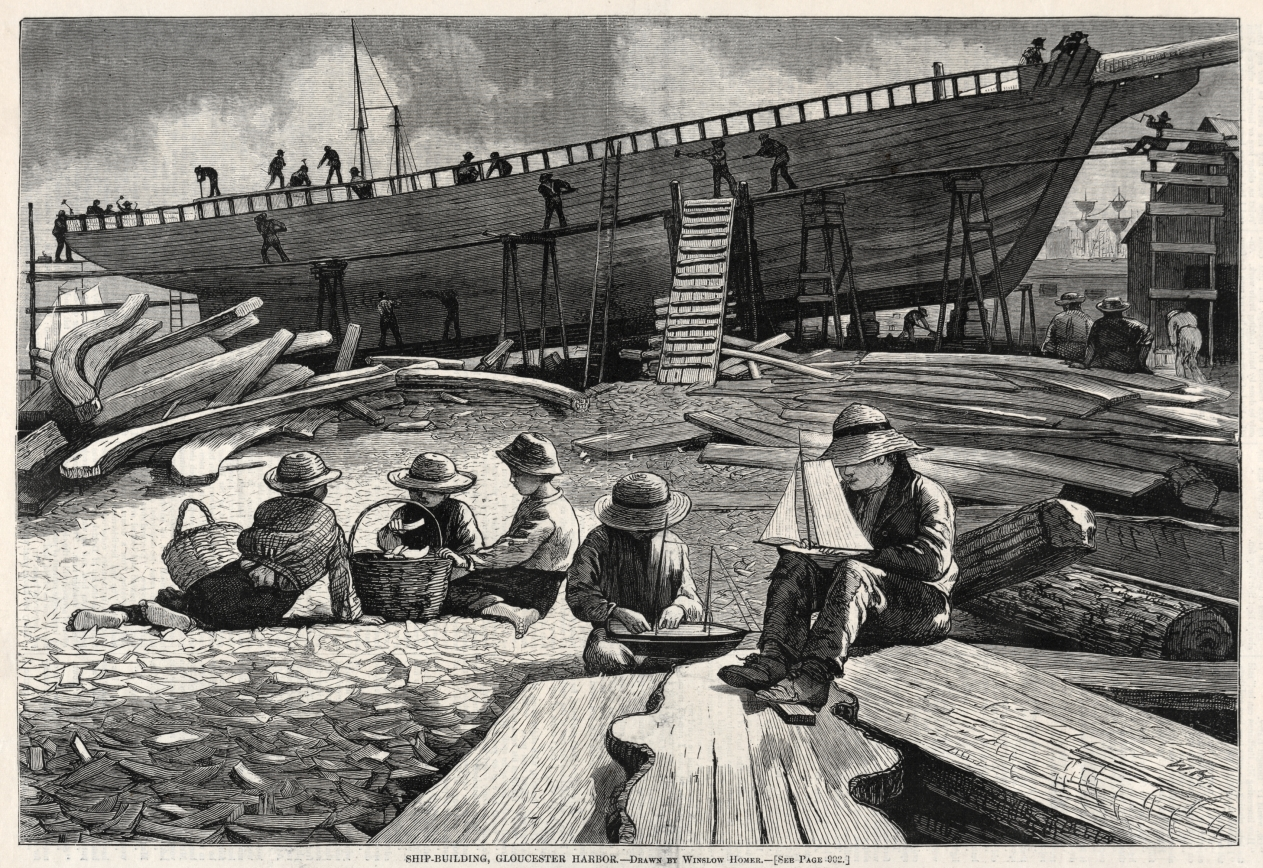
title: Ship-Building, Gloucester Harbor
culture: America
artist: Winslow Homer (American, 1836–1910)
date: 1873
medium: wood engraving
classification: Print